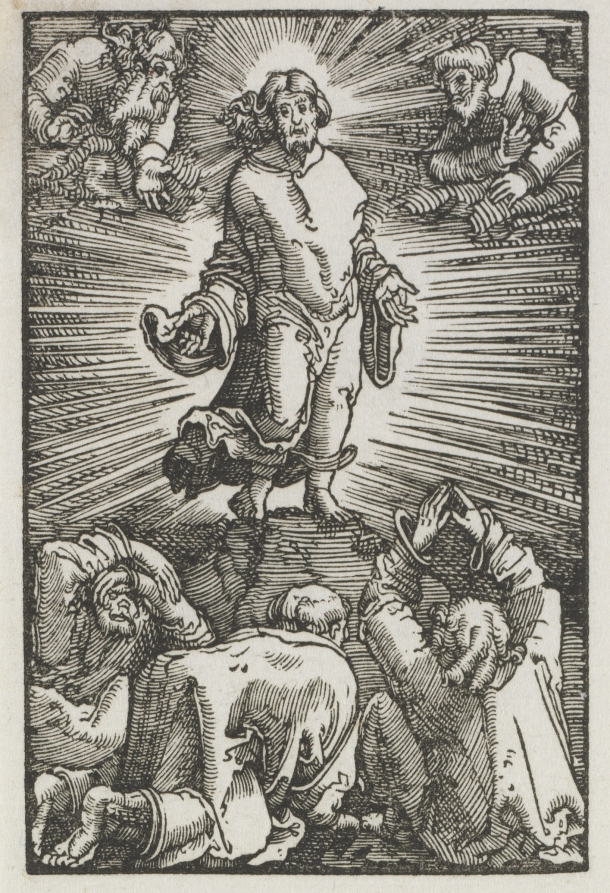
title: The Fall and Redemption of Man: The Transfiguration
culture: Germany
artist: Albrecht Altdorfer (German, c. 1480–1538)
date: c. 1515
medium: woodcut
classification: Print